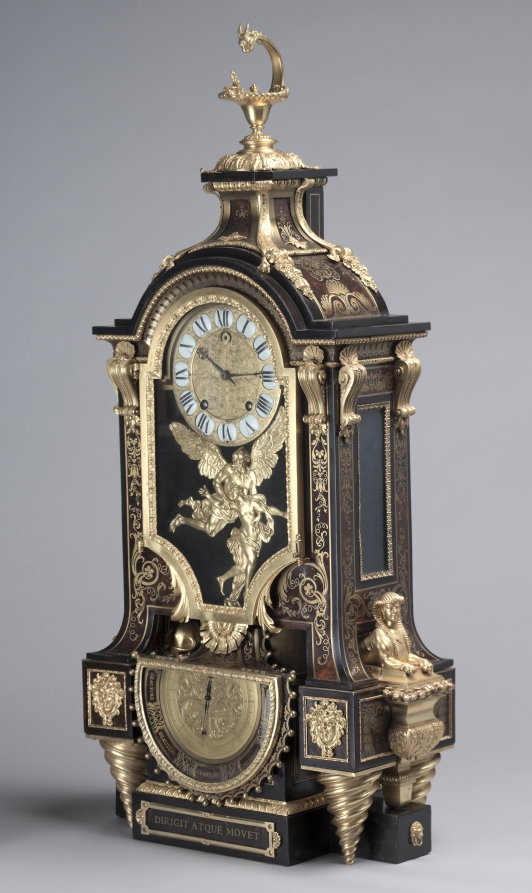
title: Clock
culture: France, late 17th Century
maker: André-Charles Boulle (French, 1642–1732)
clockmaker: Balthazar Martinot II (French, 1636–1714)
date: c. 1695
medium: tortoise shell and brass inlay, gilt bronze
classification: Furniture and woodwork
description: Appointed cabinetmaker to King Louis XIV in 1672, André-Charles Boulle became a master of furniture making in France during the late 1600s until his death in 1732. Known primarily for his use of marquetry, in which metal patterns are inlaid into tortoiseshell then applied within the veneered surface of the furniture, Boulle established a level of quality and craftsmanship few others could achieve. As a result, his work found favor at the royal court and among other aristocrats and diplomats eager to impress the king. Often exhibiting stout architectural proportions with elegant groups of inlaid motifs, Boulle’s designs are an example of the intellectual fashion for contrasting ideas, materials, and motifs. With its relatively new scientific invention of a pendulum mechanism and the addition of a barometer, the mantel clock represented the wealth, prestige, and intellect of its owner.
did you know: The Latin phrase inscribed on this clock, Dirigit atque movet, can be translated as "time constantly moves on."